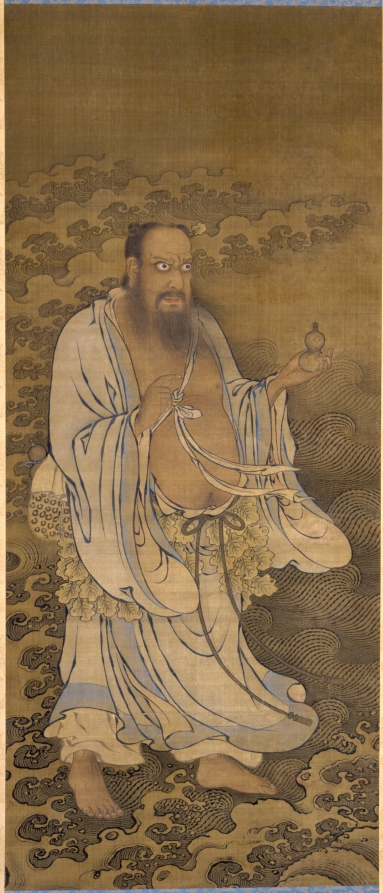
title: Zhongli Quan Crossing the Ocean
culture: China, Ming dynasty (1368–1644)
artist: Zhao Qi (Chinese, active early 1500s)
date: 1368–1644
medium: Hanging scroll; ink and color on silk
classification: Painting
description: Here, Zhongli Quan is crossing the ocean. He is one of the Eight Immortals (baxian), a group of popular Daoist figures who understood the way of life and could transform into otherworldly beings. Zhongli Quan is usually depicted as a scholar with a big belly seen through his partially open robe. The artist used expressive brushwork to depict the immortal’s fluttering robe and the roaring waves, skillfully creating a sense of movement. This scroll may have been one of a set depicting the Eight Immortals. Although the painting has no signature or seal, its style supports an attribution to the Ming dynasty painter Zhao Qi.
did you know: Zhongli Quan wears a girdle of leaves, a common Daoist immortal-recluse attribute.